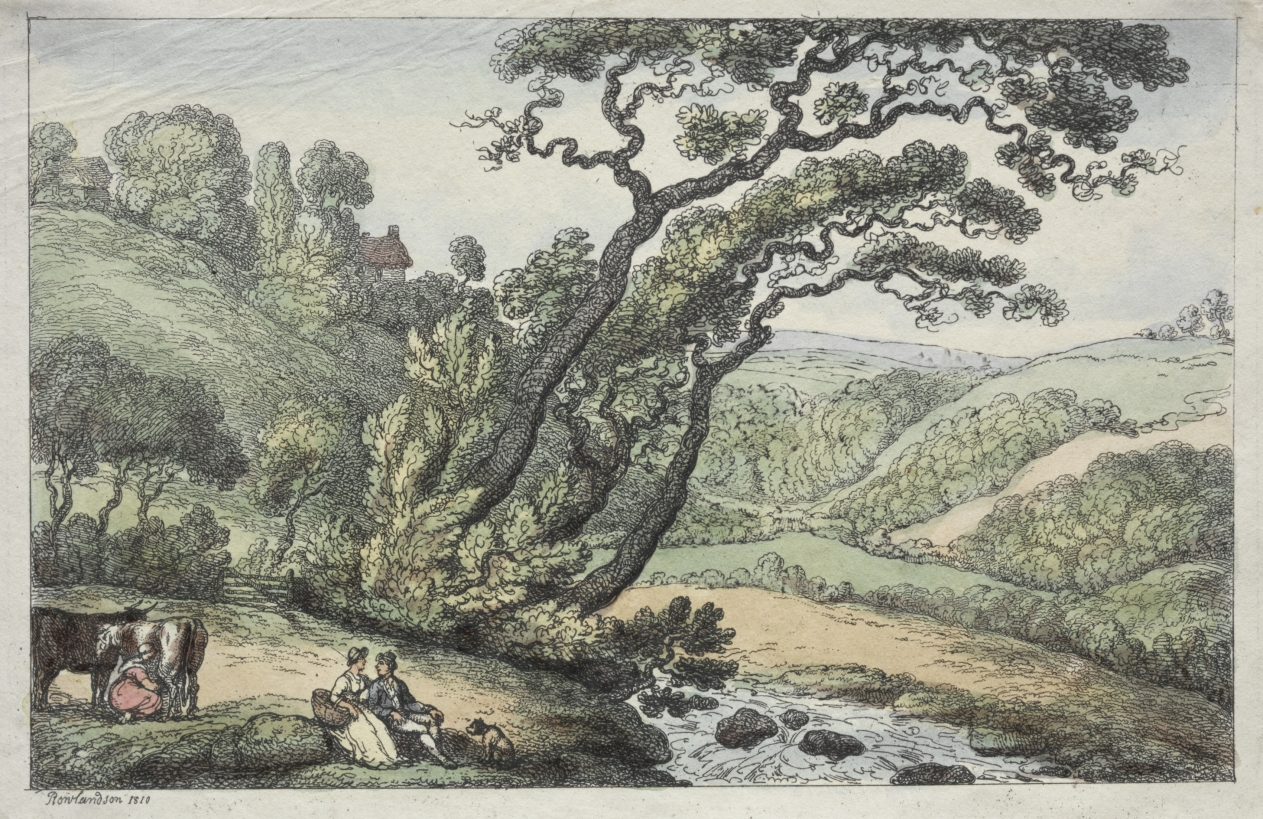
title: A Cornish View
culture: Engalnd, early 19th Century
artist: Thomas Rowlandson (British, 1756–1827)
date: 1810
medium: etching, hand colored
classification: Print